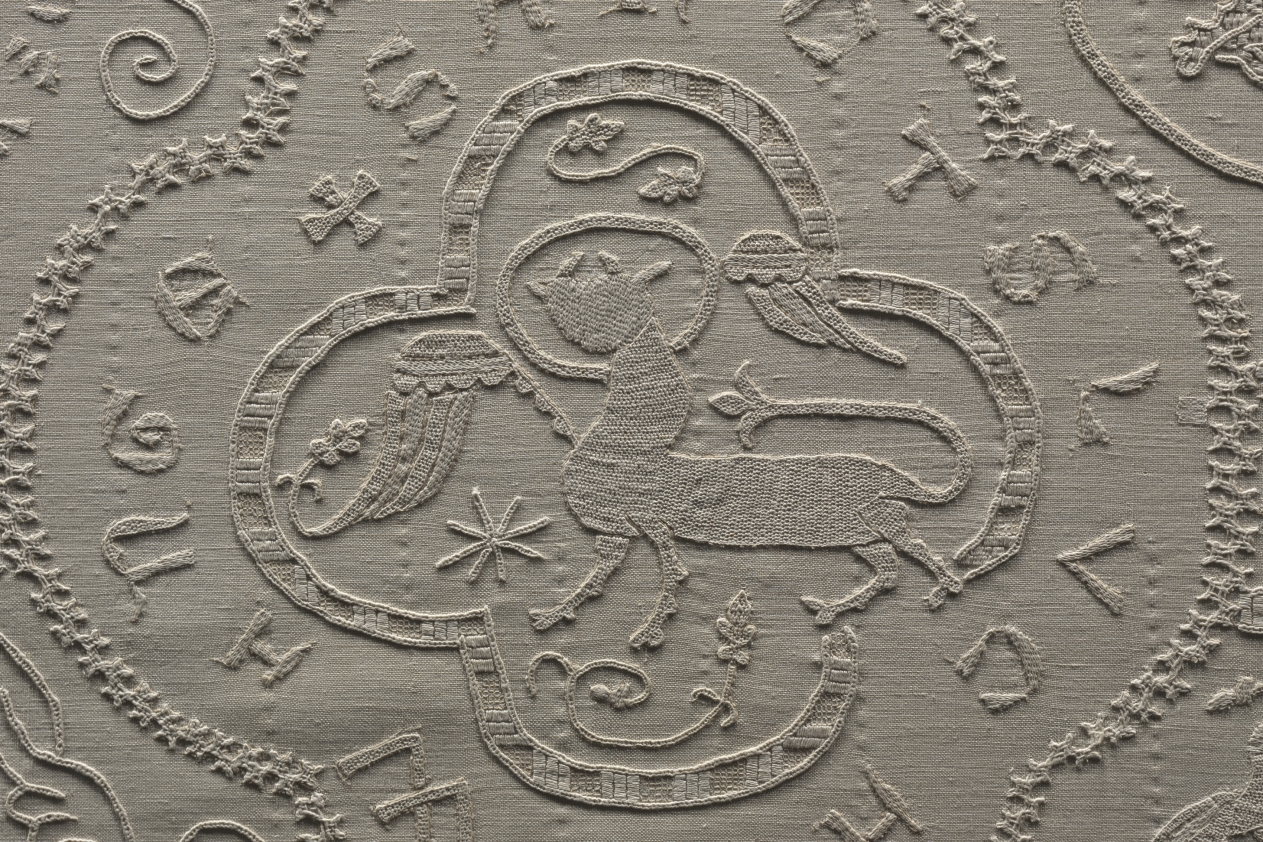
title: Altar Cloth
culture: Germany, Altenberg on the Lahn, Premonstratensian Convent, 14th century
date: c. 1350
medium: embroidery: linen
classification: Embroidery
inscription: various motifs enclosed in quatrefoils with identifying inscriptions in Gothic letters.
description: This large, embroidered altar cloth is one of the rarest, most important medieval church furnishings in existence. It was stitched by nuns in the Premonstratensian Convent in Altenberg on the Lahn River, north of Frankfurt, Germany, and was used to cover the church’s high altar in the weeks leading up to Easter. The cloth is an example of linen embroidery, a specialty of German nuns in the later Middle Ages. The Altenberg monastery church once had valuable furnishings; the high altar retable (a decorated frame with sculptures and paintings on the top of an altar) has survived, the main parts of which are now in the Städel Museum in Frankfurt, Germany.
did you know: When lit from behind, the previously hidden details emerge and the complex design becomes evident.